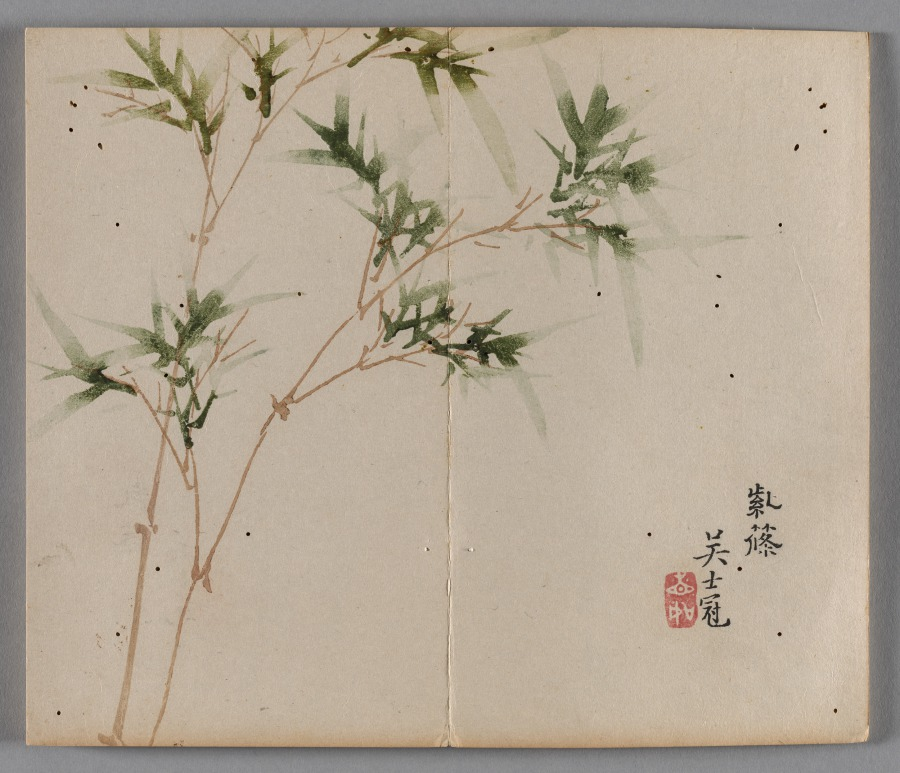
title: Ten Bamboo Studio Painting and Calligraphy Handbook (Shizhuzhai shuhua pu): Bamboo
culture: China, Qing dynasty (1644-1911)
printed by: Hu Zhengyan (Chinese, c. 1584–1674)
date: 1633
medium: Woodblock-printed book; ink and colors on paper; first edition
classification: Print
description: Color printing reached a level of perfection in the early 1600s, as seen in this Ten Bamboo Studio Collection of Calligraphy and Painting and the Mustard Seed Garden Manual of Painting (printed 1679 and 1701). The painterly quality, precision in registering (aligning) the woodblocks, and harmonious colors made them the most successful color print editions in Chinese history. Both editions were printed and compiled in Nanjing, spread nationwide, and had a great impact on the arts in Japan and Korea.